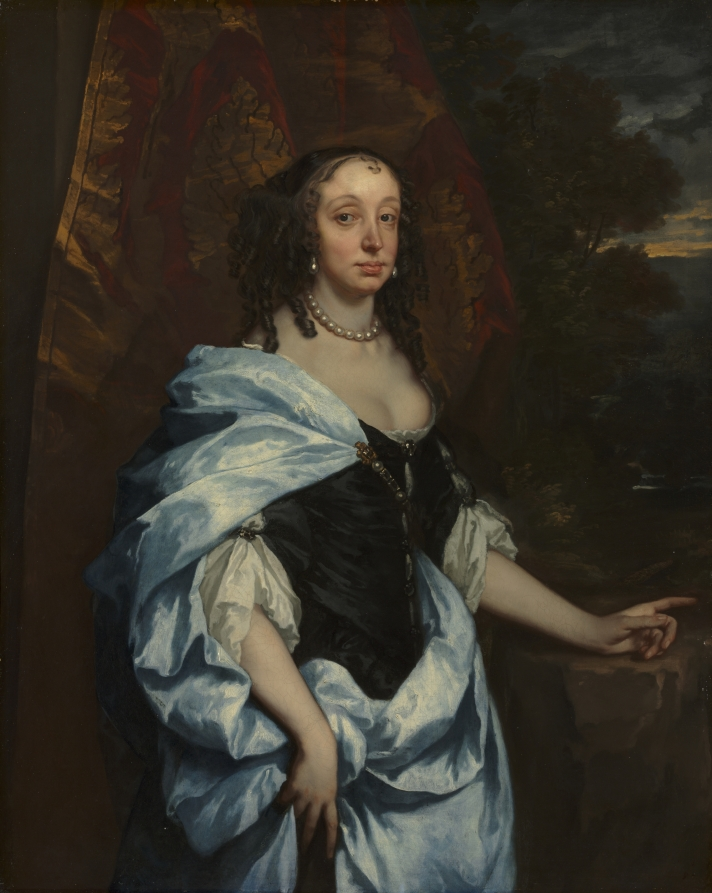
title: Portrait of Mrs. Leneve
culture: England, 17th century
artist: Peter Lely (British, 1618–1680)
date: c. 1657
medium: oil on canvas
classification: Painting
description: This woman’s heavily lidded eyes, fleshy chin, and slender fingers conform to 17th-century ideals of beauty, but when the museum acquired this painting in 1942, her features had been extensively overpainted to bring her more in line with modern standards of beauty. This later intervention included lowering the sitter’s eyebrows, reducing her prominent eyes and lips, and adding curls to make her forehead appear smaller. Mrs. Leneve now appears as the fashionable artist Peter Lely originally intended.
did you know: Long, slender fingers signified aristocratic elegance when this portrait was painted.